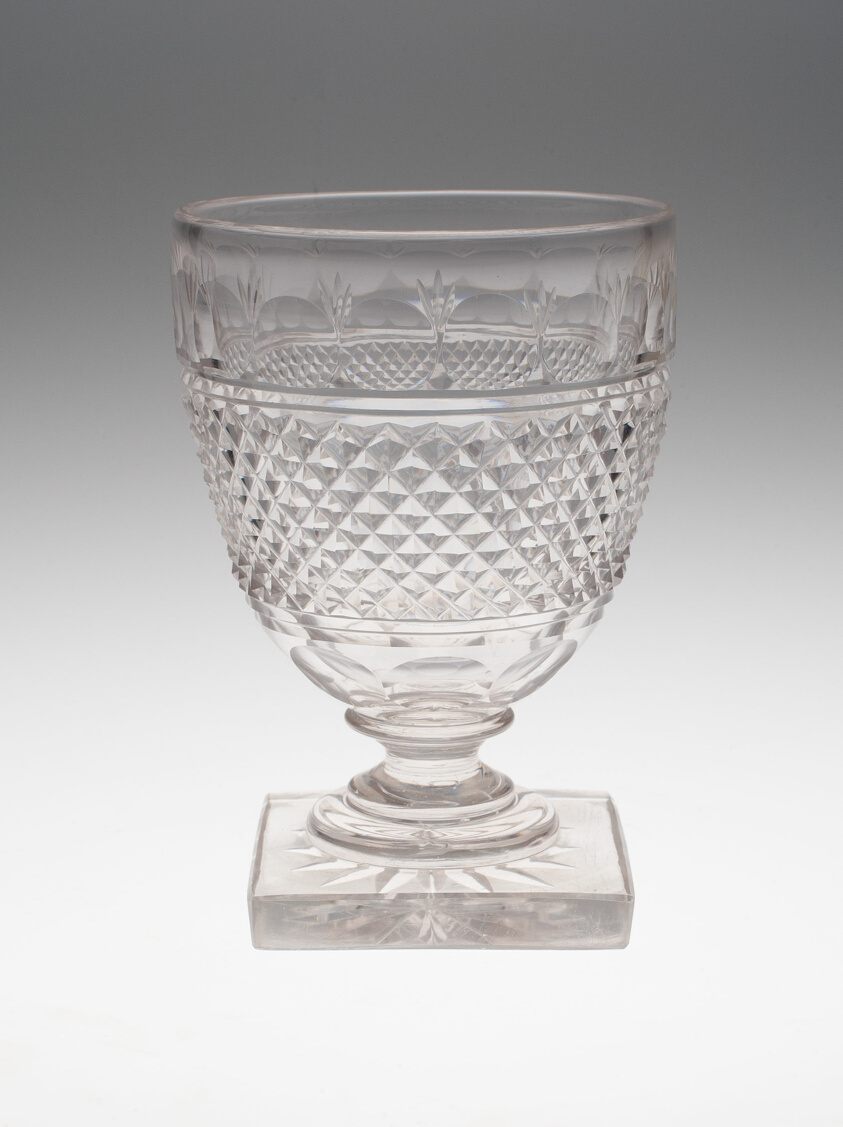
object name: Glass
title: Goblet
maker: England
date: c. 1820/30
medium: Glass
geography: England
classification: drinking vessel; glass; european decorative arts